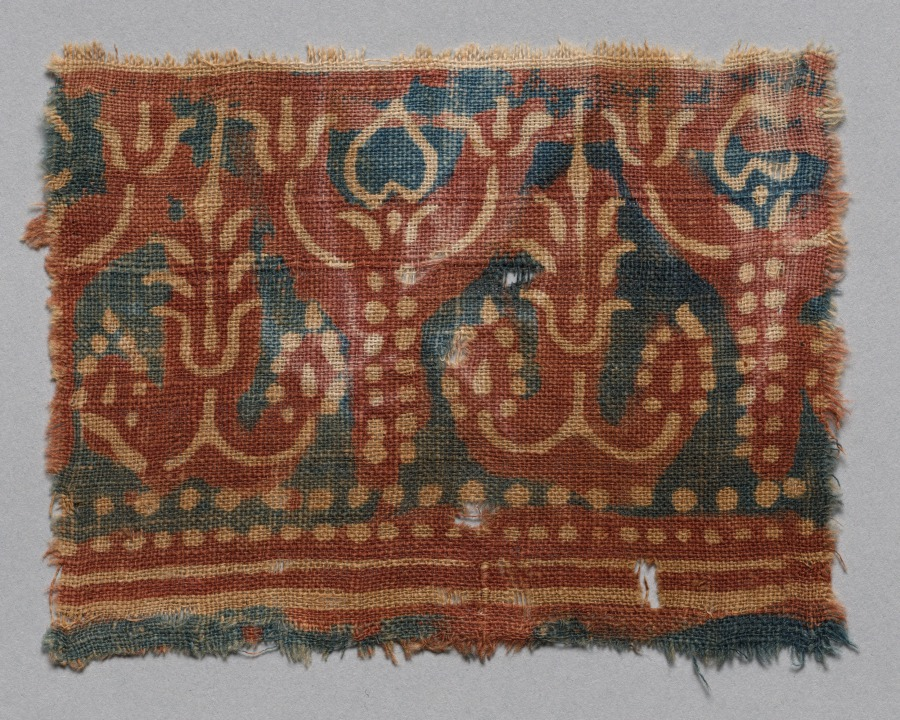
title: Fragment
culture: India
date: 1100s–1300s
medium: plain cloth, resist dyed; cotton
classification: Textile